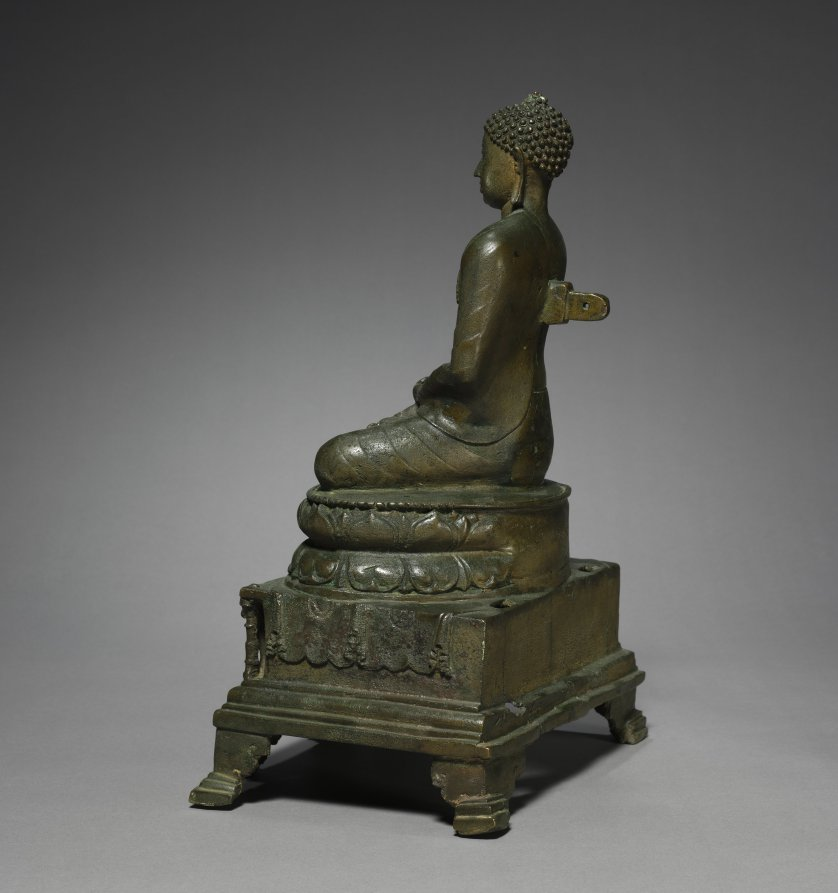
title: Akshobhya: the Buddha of the East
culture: Northeast India, Bihar, Kurkihar, Pala period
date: late 800s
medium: bronze with silver and copper inlay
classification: Sculpture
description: Made during the Pala period (750-1134) when tantric imagery was first emerging in northeastern India, this sculpture is from a cache that yielded some of the most masterful works of the north Indian bronze tradition. From this region, Tantra spread to Southeast Asia. The double-headed thunderbolt, or vajra, placed on top of the pedestal in front of the figure indicates that this is a tantric image. His hand gestures identify him as one of the Five Cosmic Buddhas, each of whom is associated with a cardinal direction of space: north, south, east, west, and center. The Buddha Akshobhya is especially invoked to eradicate the harmful emotion of anger.